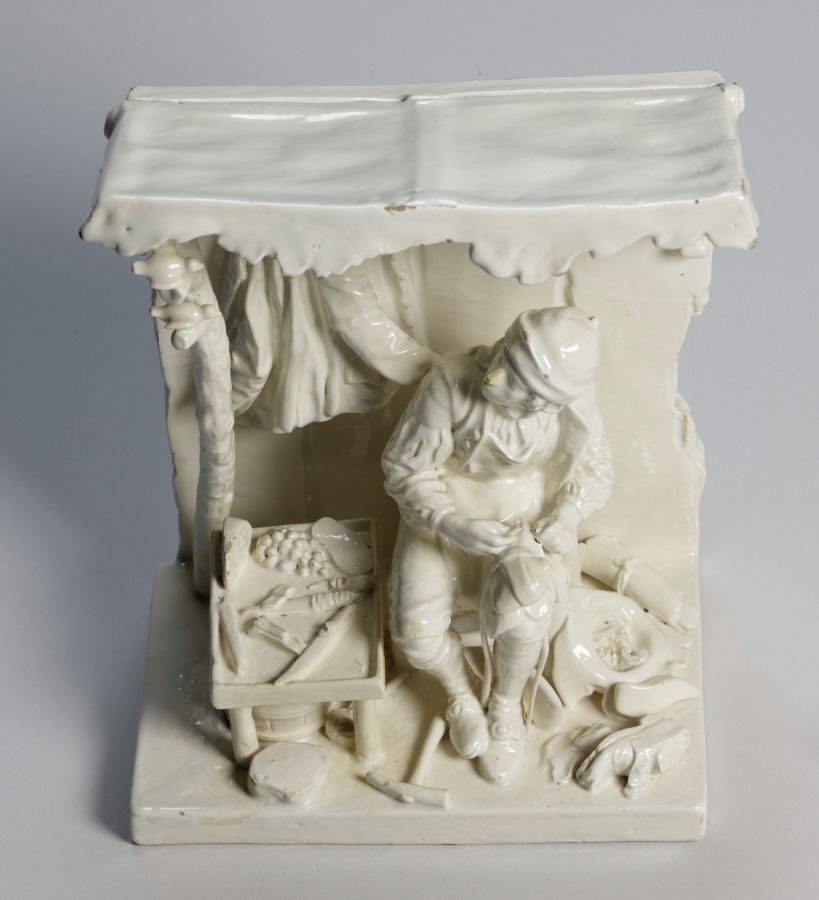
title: The Cobbler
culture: Italy or France, 19th century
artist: after a design by Paul-Louis Cyfflé (Flemish, 1724–1806)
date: 1800s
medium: earthenware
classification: Ceramic